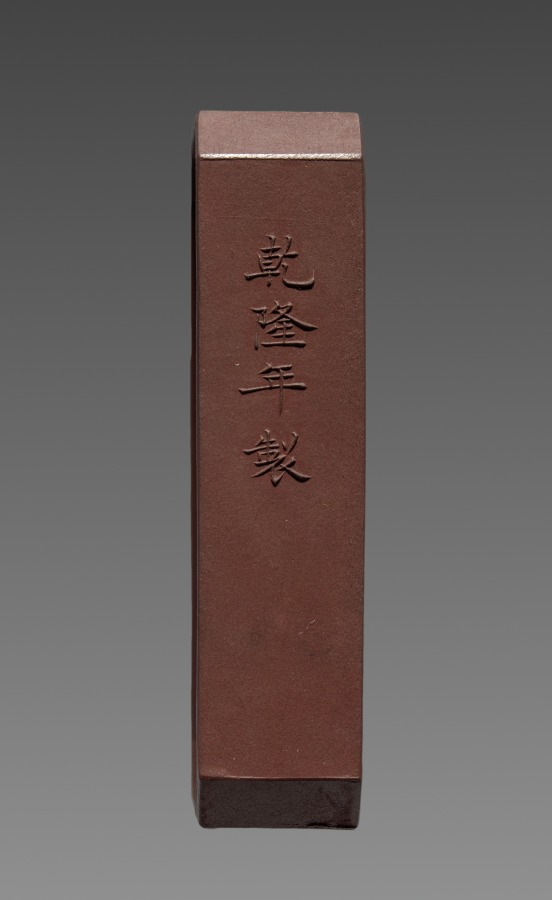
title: Ink Stick from an Imperially Commissioned Set of Ink Stick with Images and Poems of Famous West Lake Sites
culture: China, Qing dynasty (1644–1911), Qianlong reign (1736–95)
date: 1780–94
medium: Molded ink in brown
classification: Miscellaneous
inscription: 乾隆年製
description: This is one of ten ink cakes of different shapes and colors stored in an exquisite lacquer box. Each is inscribed in gold with a poem by the Qianlong emperor, praising the ten famous sights of the Westlake in Hangzhou, near Shanghai. The Westlake is famous for its natural beauty; it was a favorite imperial destination and remains a tourist attraction today. Ink cakes (also called ink sticks) are dissolved with the addition of water and ground on the surface of a flat stone into liquid ink for painting and calligraphy. The precious ink cakes here, however, have never been used.